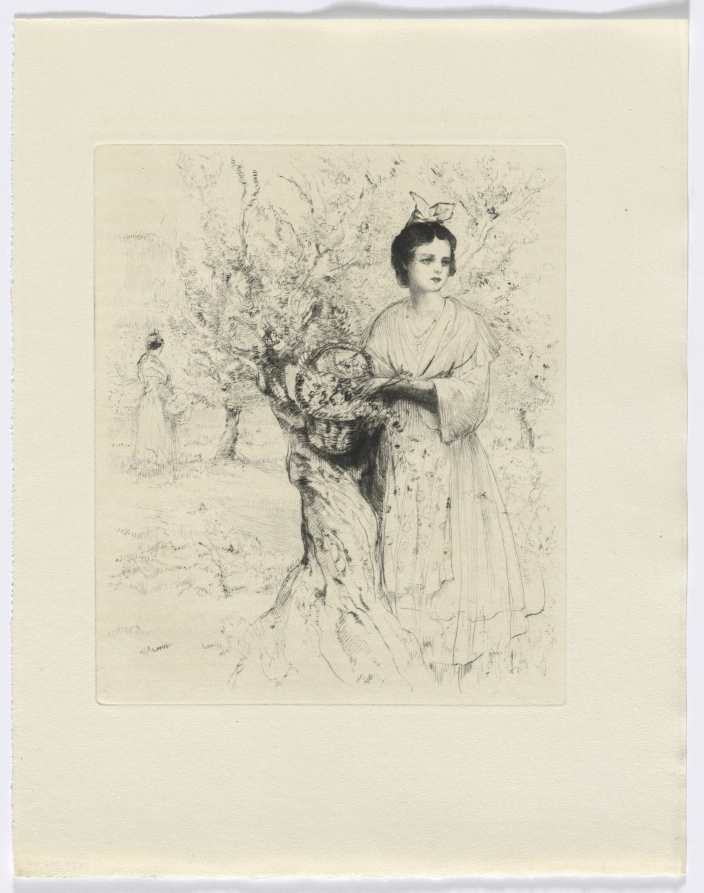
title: Frédéric Mistral: Mémoires et Recits by Frédéric Mistral: woman outside with a basket of flowers (insert after p. 192)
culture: France, 20th century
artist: Auguste Brouet (French, 1872–1941)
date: 1937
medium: etchings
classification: Portfolio